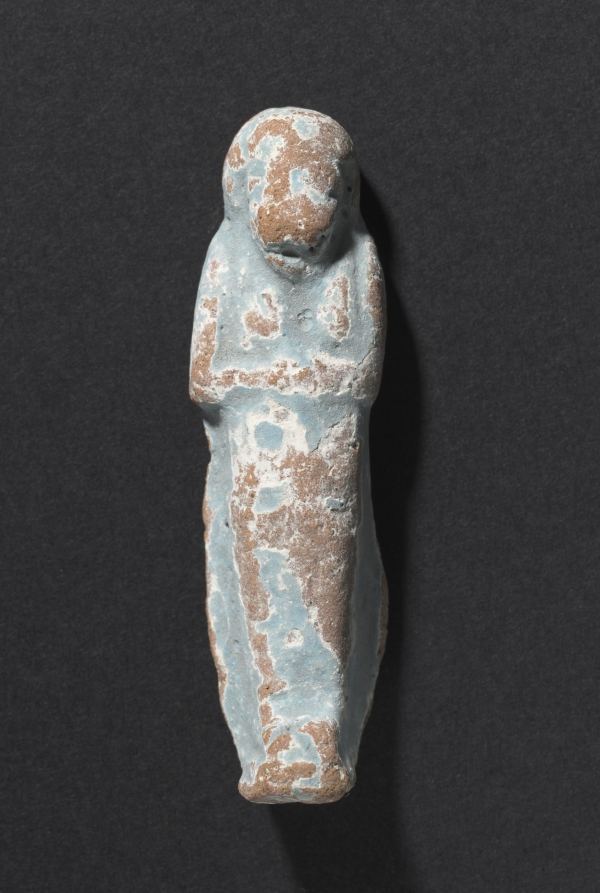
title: Shawabty of Ditamenpaankh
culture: Egypt, Late period (715–332 BCE), Dynasty 25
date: 715–656 BCE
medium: terracotta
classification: Funerary Equipment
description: High demand for shawabtys in the Late Period, a time when as many as 400 or more shawabtys were placed in the tomb with the deceased, gave rise to a specialized container for storing them: the shawabty box. This example is inscribed for the lady of the house, Ditamenpaankh, and was probably one of a pair originally made for her. The single-masted boat on the box's lid is perhaps an allusion to the pilgrimage of the deceased to the holy city of Abydos, the cult city of Osiris, king of the dead. The shawabtys inside are crude, mass-produced examples cast in an open mold. Made of terracotta, their blue paint imitates more costly shawabtys made of faience. As for the shawabty spell, it has been removed from its traditional location on the shawabty's front and relocated onto the sides of box, where it needed only to be written once, thus expediting production.